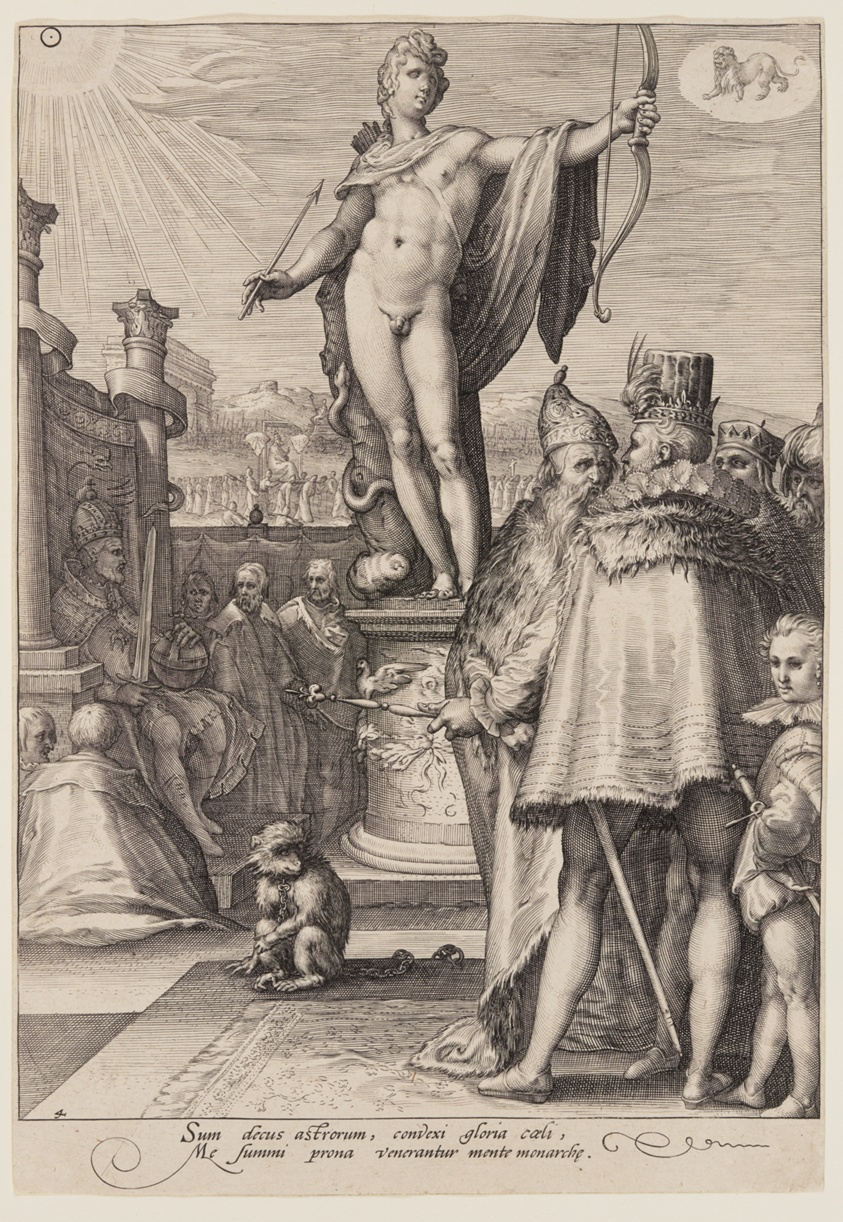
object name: Print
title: Apollo Presiding over the Arts of Government, from Seven Planetary Gods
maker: Jan Saenredam (Dutch, 1565–1607); after Hendrick Goltzius (Dutch, 1558–1617)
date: 1596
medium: Engraving on ivory laid paper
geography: Netherlands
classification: engraving; paper; print; prints and drawing